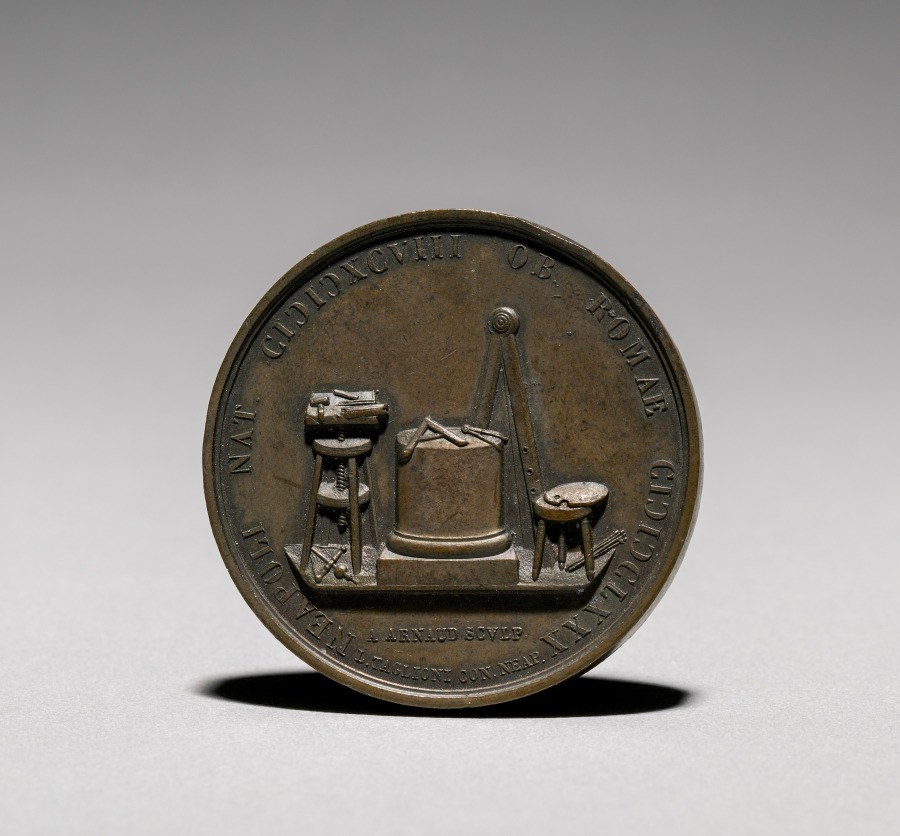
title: Medal Depicting Gian Lorenzo Bernini (1598-1680) from the Illustrious Men of the Kingdom of the Two Sicilies (reverse)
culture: France, 20th century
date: 1830–34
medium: bronze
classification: Metalwork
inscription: On the reverse: NEAPOLI NAT. CICICXCVIII OB. ROMAE CICICCLXXX Trestle with tools for sculptor column with tools for architect and stool with palette and brushes, at the bottom easel. Below: A. ARNAUD SCVLP. L. TAGLIONI CON. NEAP.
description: Gian Lorenzo Bernini was an Italian sculptor, urban planner, architect, painter, set designer, and playwright during the Renaissance. He designed many churches, monuments, and the canopy over the high altar at St. Peter's Basilica in Rome.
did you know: Naples was a center of medal and coinage minting for several centuries in the Kingdom of the Two Sicilies.